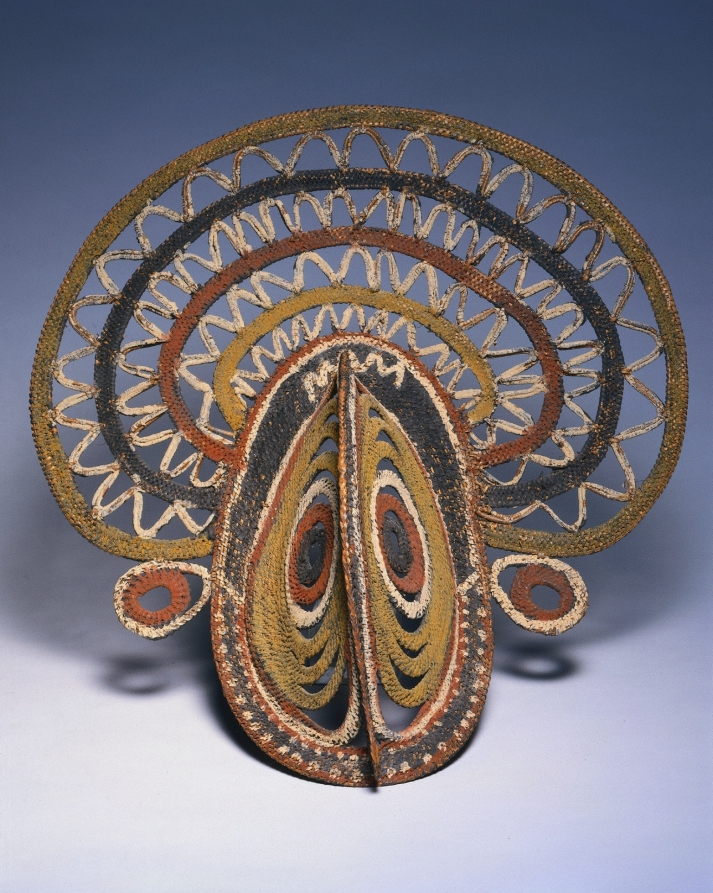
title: Yam Mask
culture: Melanesia, Papua New Guinea, Abelam People, 20th century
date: 1900s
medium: pigment, basketry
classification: Basketry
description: Abelam men compete in growing extraordinarily large yams (over a meter in length), which they then display, adorned with basketry masks.